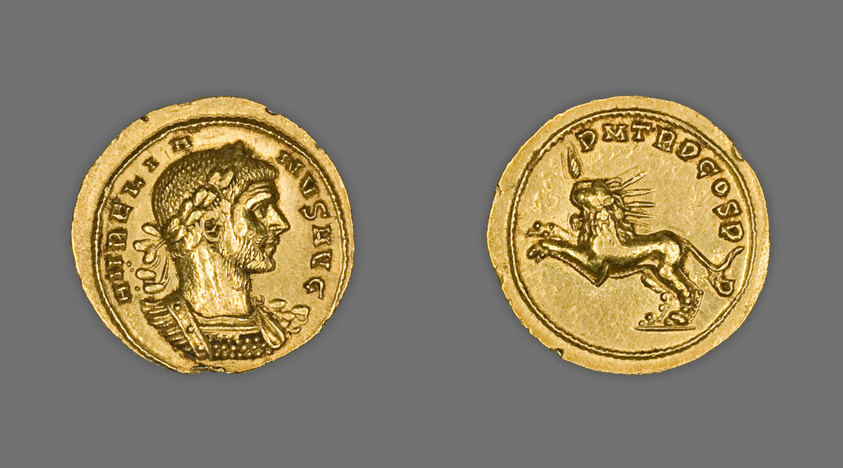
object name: Coin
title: Aureus (Coin) Portraying Emperor Aurelian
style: imperial (roman), ancient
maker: Roman, possibly minted in Siscia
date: 272, issued by Aurelian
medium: Gold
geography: Rome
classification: coin; ancient art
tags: portraits, animals